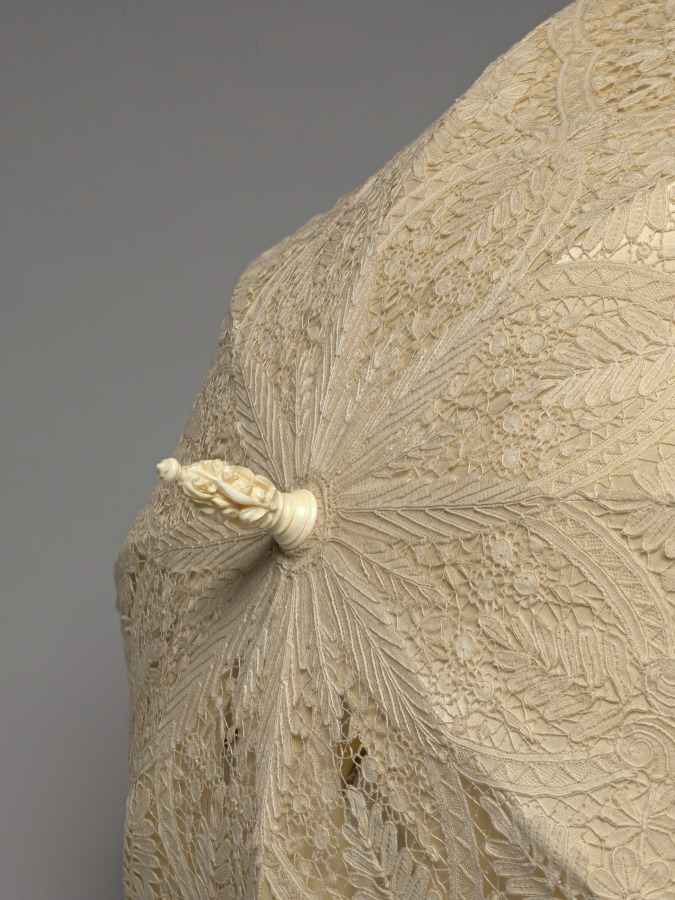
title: Lace Parasol with Ivory Handle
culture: Belgium, Brussels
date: 1880–99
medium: Needle lace and bobbin lace (Point Duchesse Lace) with carved ivory handle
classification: Lace